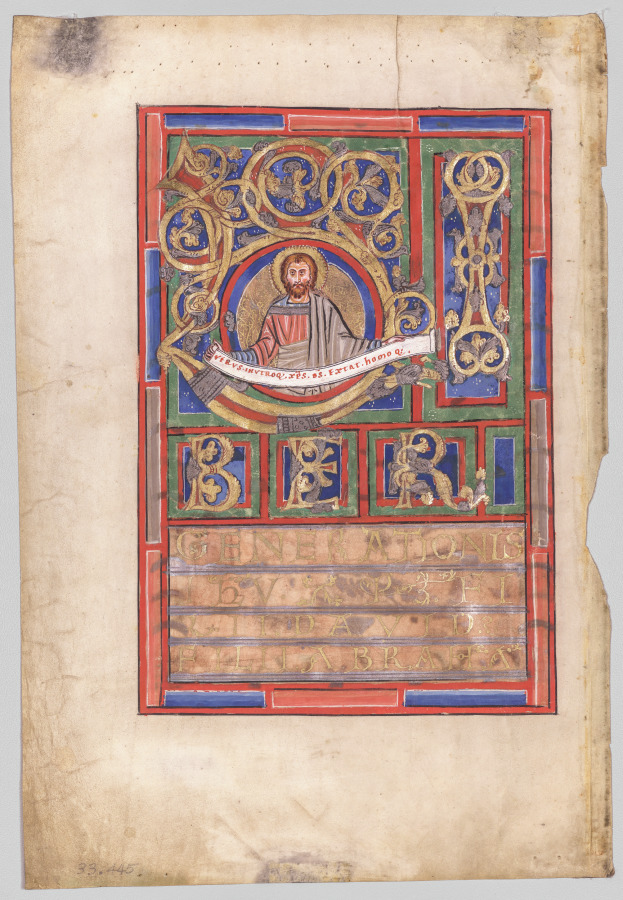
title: Single Leaf Excised from a Gospel Book with Initial L[iber generationis]: St. Matthew (verso)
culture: Germany, Helmarshausen Abbey, 12th century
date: c. 1190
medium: ink, tempera, silver, and gold on vellum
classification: Manuscript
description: This leaf comes from a volume that is preserved in the Trier Cathedral Library in Germany (Codex 142).